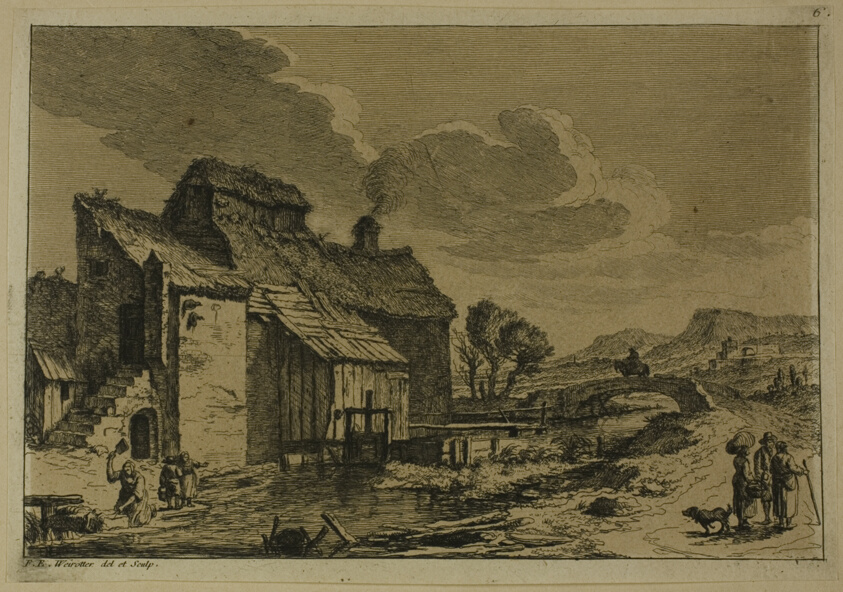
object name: Print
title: The Mill by the Stream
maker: Franz Edmund Weirotter (Austrian, 1730-1771)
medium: Etching on light tan wove paper, laid down on tan wove paper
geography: Austria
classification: etching; print; prints and drawing